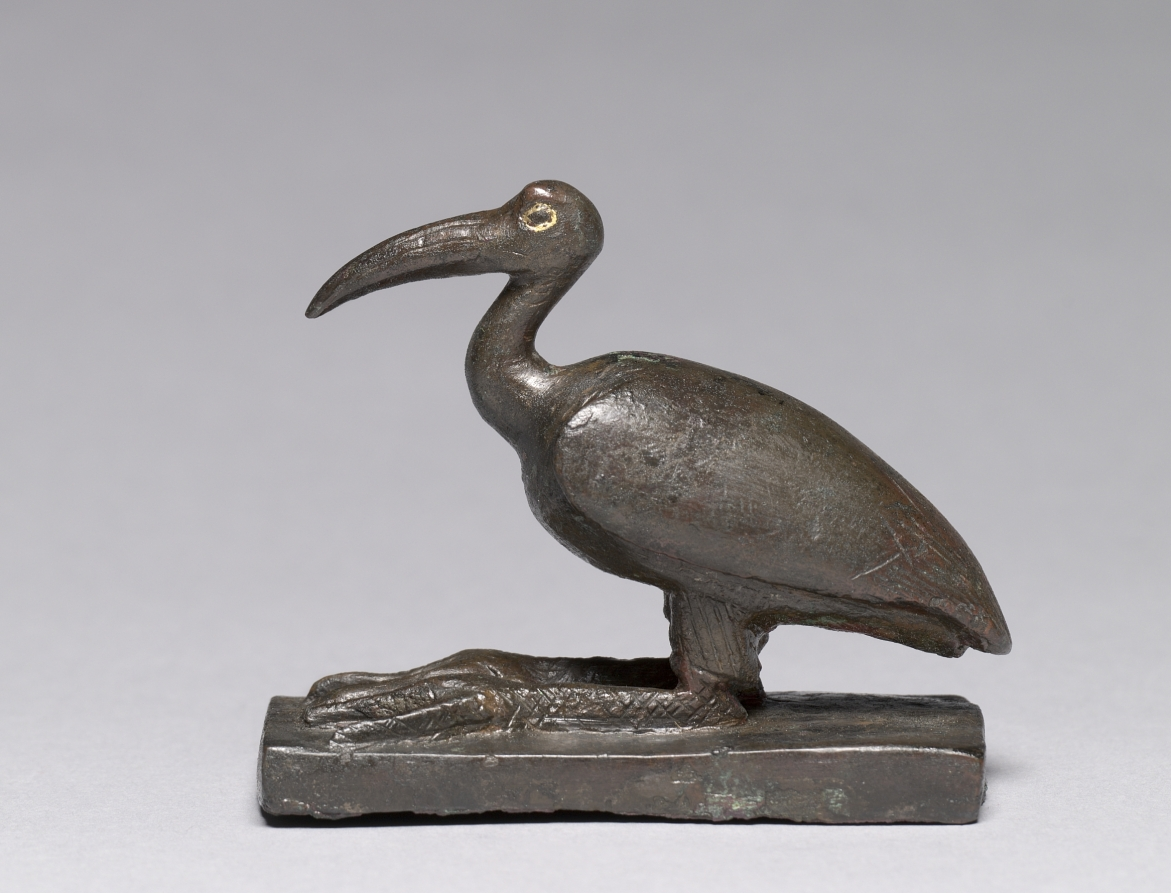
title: Ibis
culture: Egypt, Late period (715–332 BCE), Dynasty 26 or later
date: 664–30 BCE OR 664–330 BCE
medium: bronze, solid cast, with gold-rich inlays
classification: Sculpture